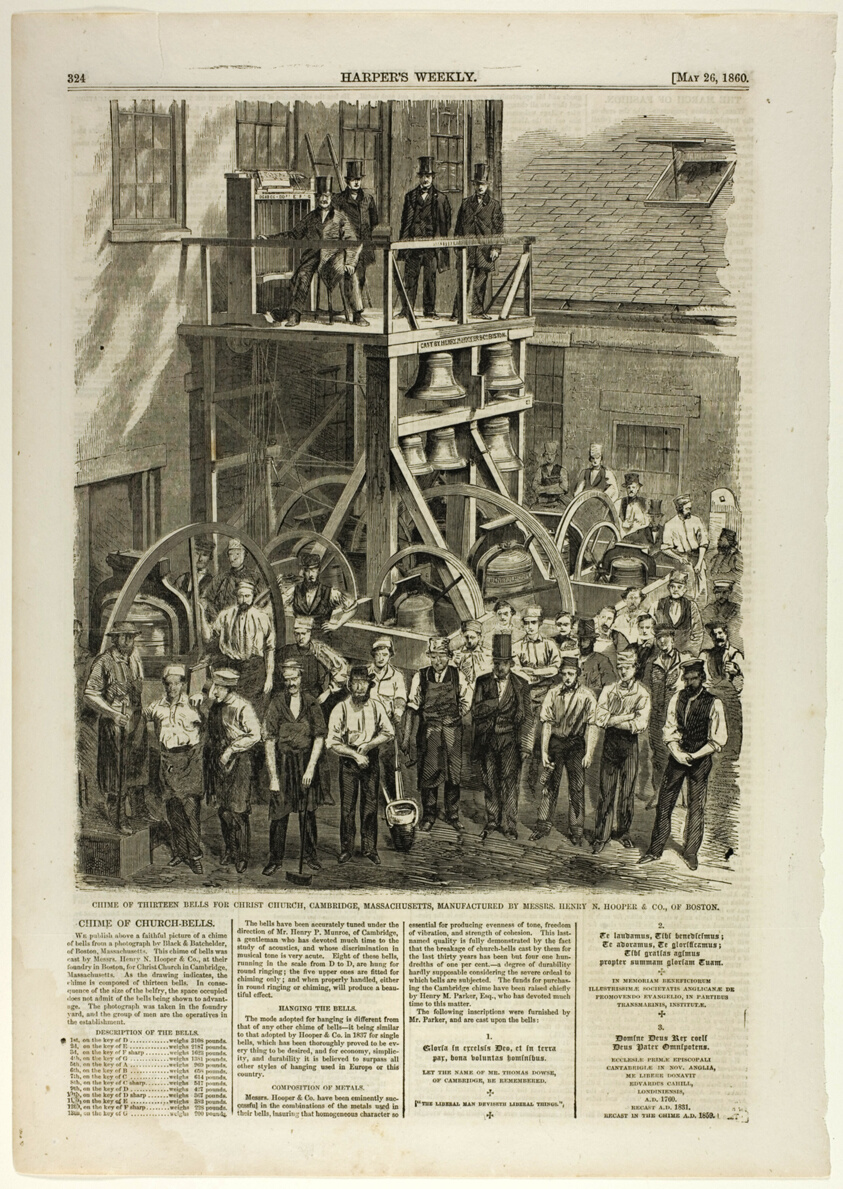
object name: Print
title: Chime of Thirteen Bells for Christ Church, Cambridge, Massachusetts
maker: Winslow Homer (American, 1836-1910); published by Harper's Weekly (American, 1857-1916)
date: published May 26, 1860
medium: Wood engraving on paper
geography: United States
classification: wood engraving; print; prints and drawing